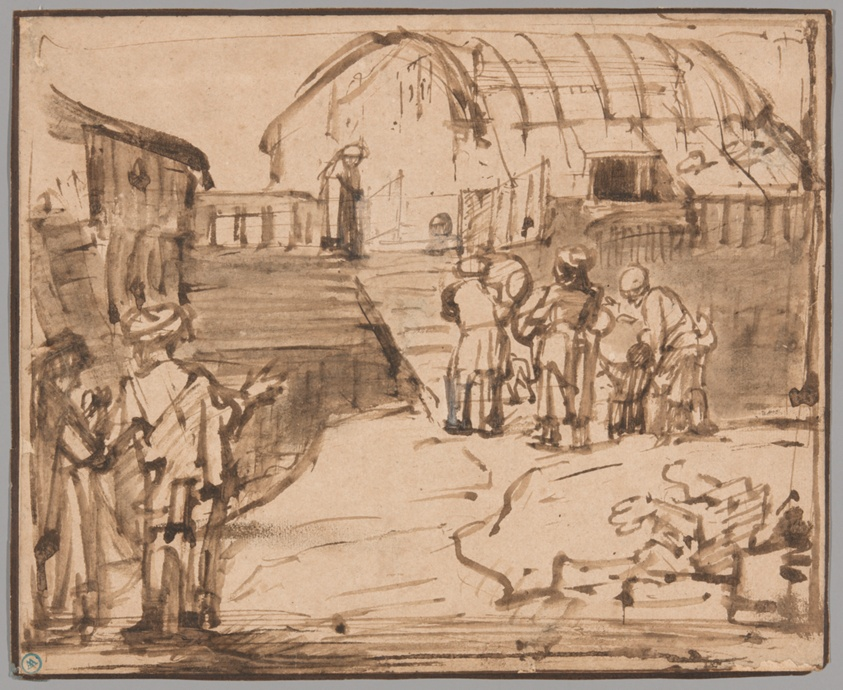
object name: Drawing and Watercolor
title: Noah's Ark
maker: Rembrandt van Rijn (Dutch, 1606-1669)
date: c. 1660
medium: Pen and brown ink and brush and brown ink wash on cream laid paper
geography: Holland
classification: pen and ink drawings; drawings (visual works); prints and drawing